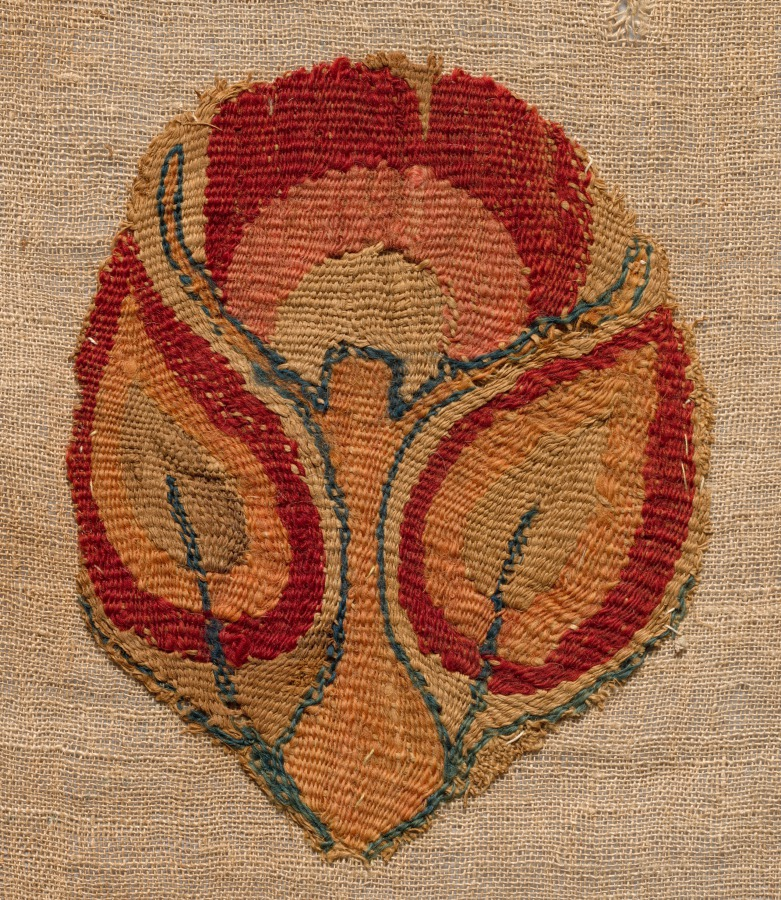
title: Fragments from a Curtain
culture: Egypt, Byzantine period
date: 300s–500s CE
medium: tapestry (originally inwoven in tabby ground, applied to plain tabby linen); linen and wool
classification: Textile